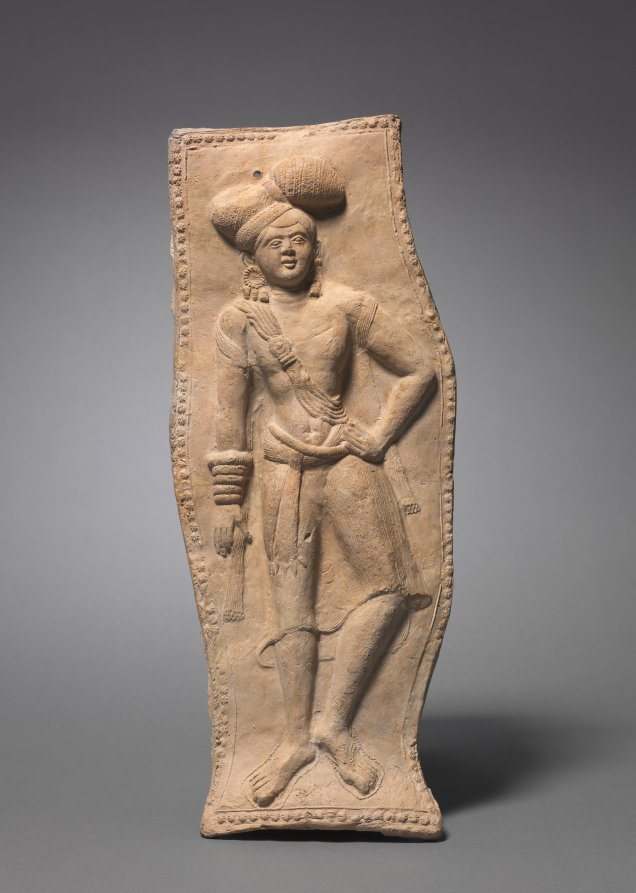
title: Male Figure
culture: India, Bengal, Chandraketugarh area, Shunga period (185–78 BCE)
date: c. 100 BCE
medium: Molded terracotta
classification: Sculpture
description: This idealized male figure appears to be the epitome of wealth and success—the attributes sought by a faithful devotee who performs regular worship at a sacred site. The bulbous turban with finely incised textile patterning is characteristic of the style from this period, as are the pinched facial features and the hem of the lower garment that swirls out around the legs.